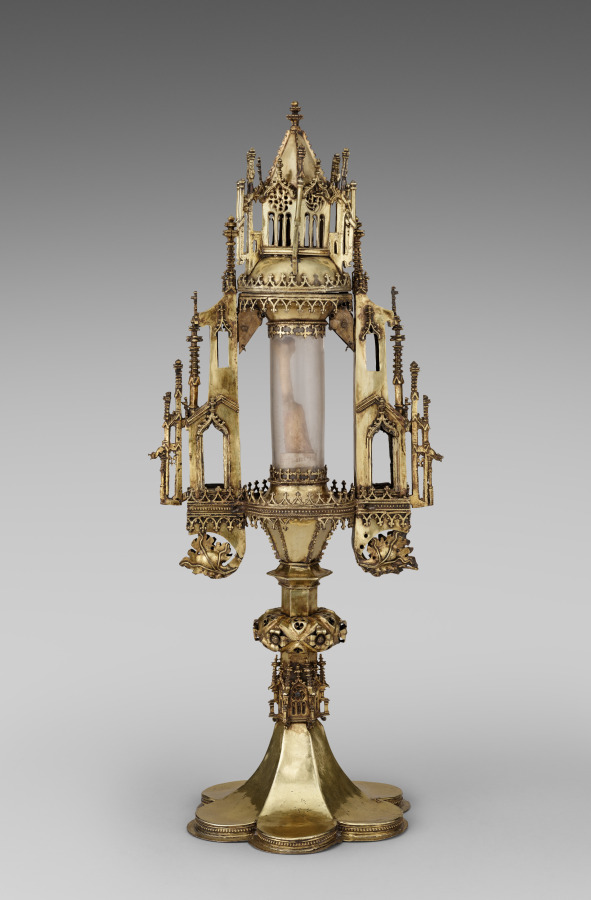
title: Monstrance with a Relic of Saint Sebastian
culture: Germany, Lower Saxony, Brunswick, Gothic period, 15th century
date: 1484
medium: gilded silver, rock crystal, bone, parchment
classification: Metalwork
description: This Late Gothic monstrance (from the Latin monstrare, "to show") is mentioned in the earliest inventory of Saint Blaise as "a large new monstrance containing relics of Saint Sebastian the martyr." Judging from surviving receipts, the reliquary was made by Werner Korff, a local goldsmith, who received payments for silver and gilding at the end of 1484. The reliquary was first displayed on the altar of the church of Saint Blaise in a solemn penitential mass on June 4, 1484, in an effort to ward off the plague. A recent examination revealed that the relic is a human metatarsal bone (one of five long bones of the human foot) and that its owner seemed to have suffered from periostitis, a medical condition that affects the connective tissue surrounding the bone.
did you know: In the Middle Ages, people suffering from diseases might make a journey, or pilgrimage, to venerate relics such as this one. The faithful believed that the remains of saints and holy people like Saint Sebastian could help those seeking aid such as relief from the plague.